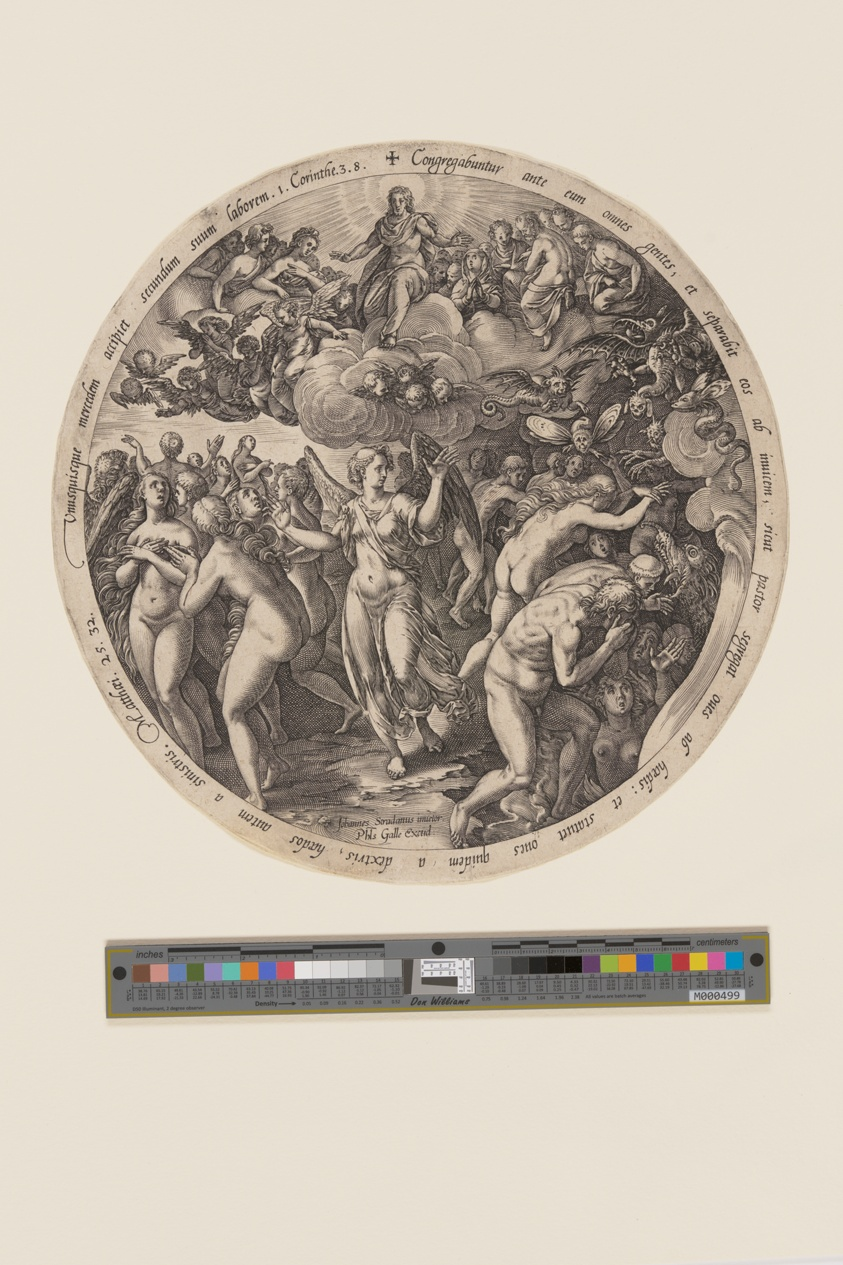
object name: Print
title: The Separation of the Blessed and the Damned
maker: Hendrick Goltzius (Dutch, 1558–1617); after Jan van der Straet (Flemish, 1523–1605)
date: c. 1578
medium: Engraving on ivory laid paper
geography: Netherlands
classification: engraving; paper; print; prints and drawing